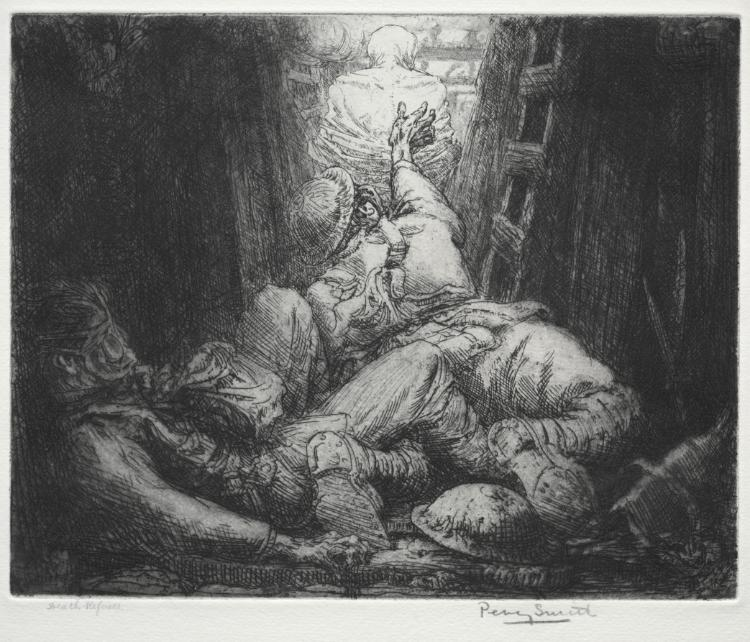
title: Dance of Death: Death Refuses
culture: England, 20th century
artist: Percy John Delf Smith (British, 1882–1948)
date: 1919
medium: etching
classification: Print